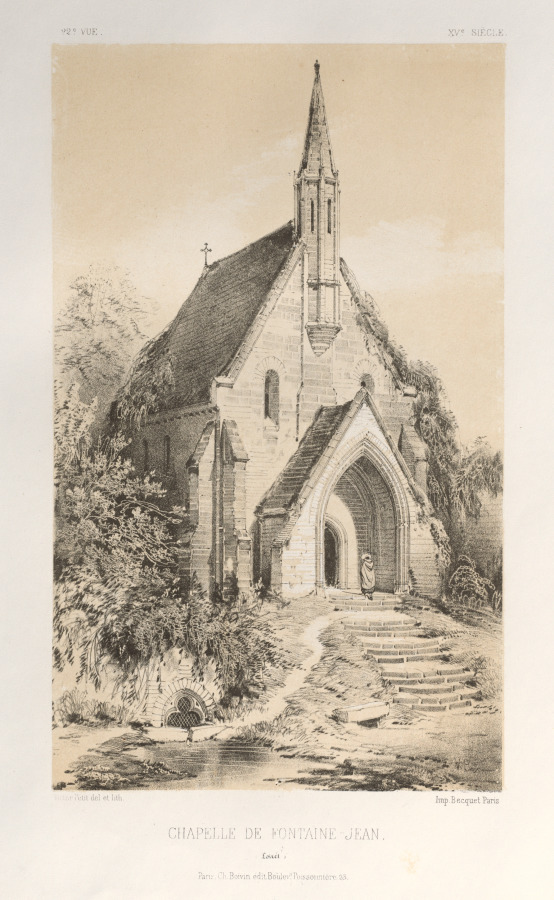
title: Architecture Pittoresque ou Monuments des xveme. Et xvieme. Siecles: Chateaux De France des XV et XVI Siecles: Pl.22, Chapelle de Fontaine-Jean (Loiret)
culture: France, 19th century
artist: Victor Petit (French, 1817–1874)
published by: Charles Boivin (publisher and editor); Lith de Godard a Paris (printer)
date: published 1860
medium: lithograph with tint stone, from portfolio of 100 lithographs with tint stone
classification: Print